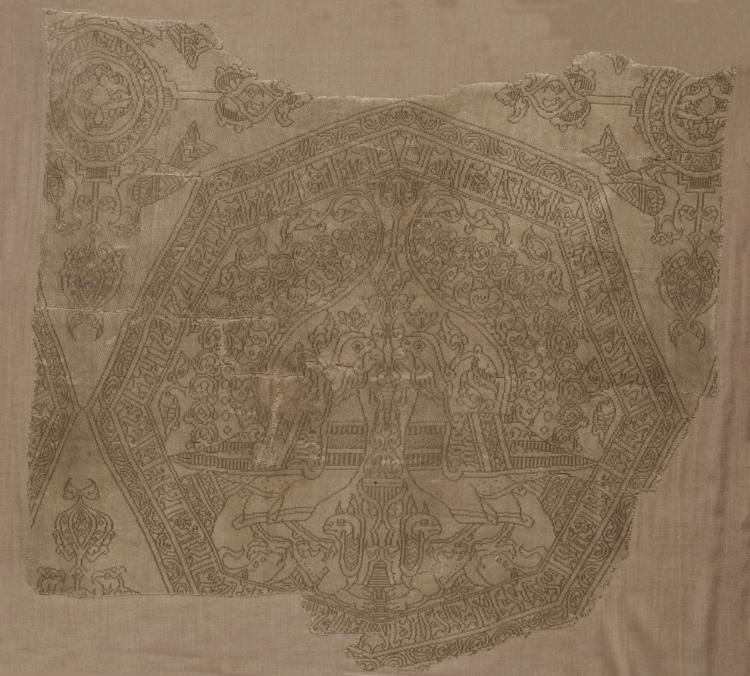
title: Fragment with Inscription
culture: Iran, style of the Abbasid period (750–1258) or Buyid period (945–1055)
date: early 900s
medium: Silk: lampas weave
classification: Textile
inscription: translation of Arabic inscription: "May its owner possess felicity, well-being, good fortune, prosperity, good health, ease, blessing, safety, and security."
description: This fragment preserves a large-scale octagon enclosing a pair of peacocks which stand on recumbent griffins and flank a palmette tree. The inner edges of the octagon contain an inscription blessing its owner. The outer edges of the octagon are ornamented with abstract leaves. In the interspaces between octagons are floral roundels, each containing four birds; from the top, bottom, and sides of each roundel spring palmette trees, of which the top and bottom are flanked by birds. According to recent analysis of the museum’s Buyid textile materials, some have been identified as modern reproductions.